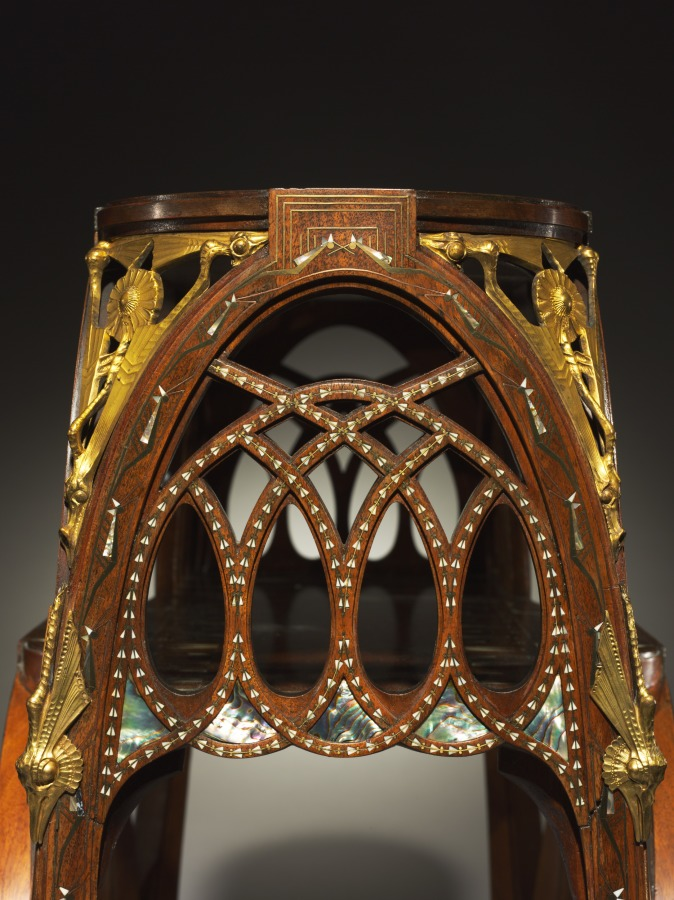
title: Tea Table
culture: France, Paris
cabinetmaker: Carlo Bugatti (Italian, 1856–1940)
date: c. 1907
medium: inlaid wood (mahogany?), cast and gilded bronze mounts, inlays of ivory or bone, metal, and mother-of-pearl (marine mussels or pearl oysters)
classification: Furniture and woodwork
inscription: signed in ligature in white metal inlay on central shelf: Bugatti.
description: Luxurious materials might catch the eye first, but a closer look reveals the imaginary creatures that adorn the surface of this table. Featuring elaborate arches, a favorite motif that appeared throughout Bugatti's furniture, this fantastical imagery is a window into the designer's expressive imagination.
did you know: Carlo Bugatti's sons achieved illustrious careers of their own. Rembrandt Bugatti (1884-1916) became a celebrated sculptor, and Ettore Bugatti (1881-1947) manufactured luxurious automobiles and racing cars.